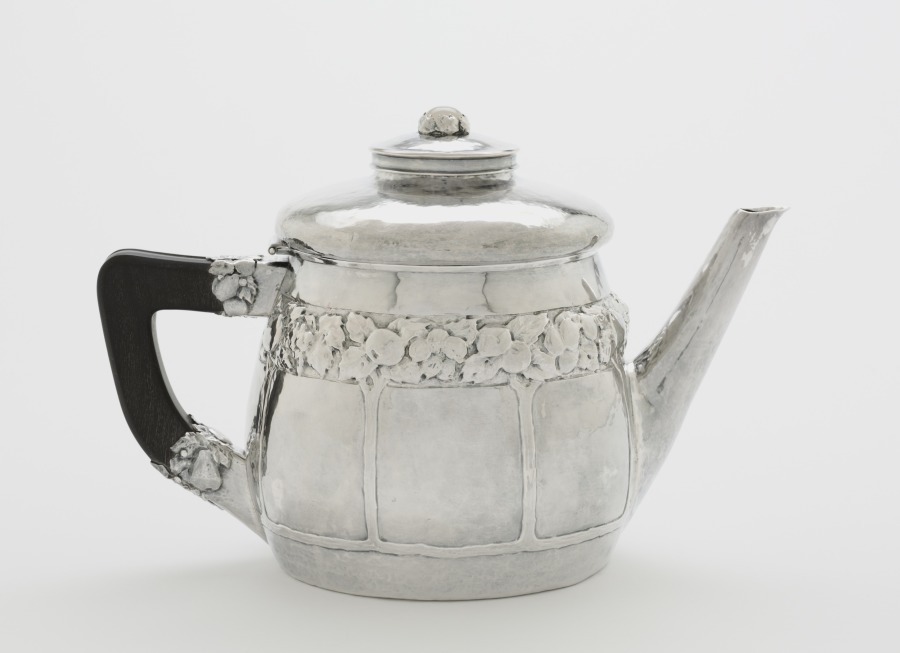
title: Teapot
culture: America, Ohio, Cleveland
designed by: Louis Rorimer (American, 1872–1939)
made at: and Rokesley Shop (American)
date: c. 1910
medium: silver, moonstones, ebony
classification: Silver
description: This tea and coffee service was designed for production by the Rokesley Shop, a collaborative group working at Louis Rorimer’s studio. Reacting against industrial mass production, Rorimer emphasized inventive design in finely crafted objects.